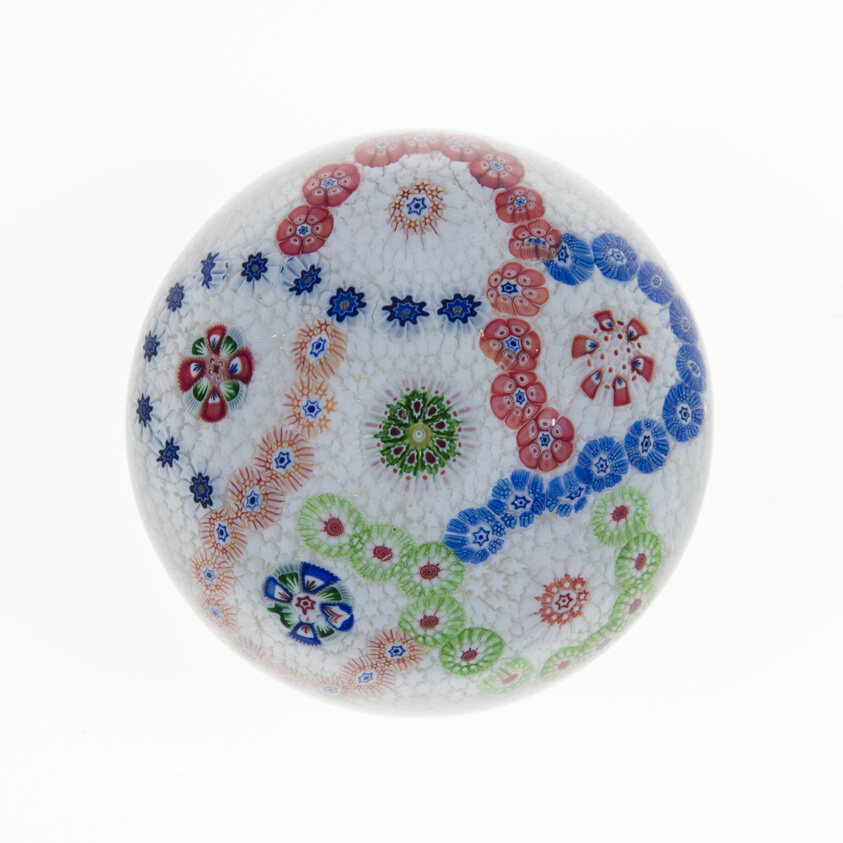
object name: Glass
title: Paperweight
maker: Baccarat Glassworks (Cristalleries de Baccarat); Lorraine, France, founded 1764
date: c. 1845/60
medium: Glass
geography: France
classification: paperweight; glass